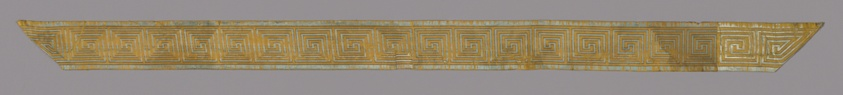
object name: Religious/Ritual Object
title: Section of Border from Thanka (Religious Picture)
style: qing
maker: Manchu (China)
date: 18th century, Qing dynasty (1644–1911)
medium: Silk, warp-float faced 2:1 's' twill weave with plain interlacings of secondary binding warps and supplementary patterning wefts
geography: China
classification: textile; weaving; ritual objects